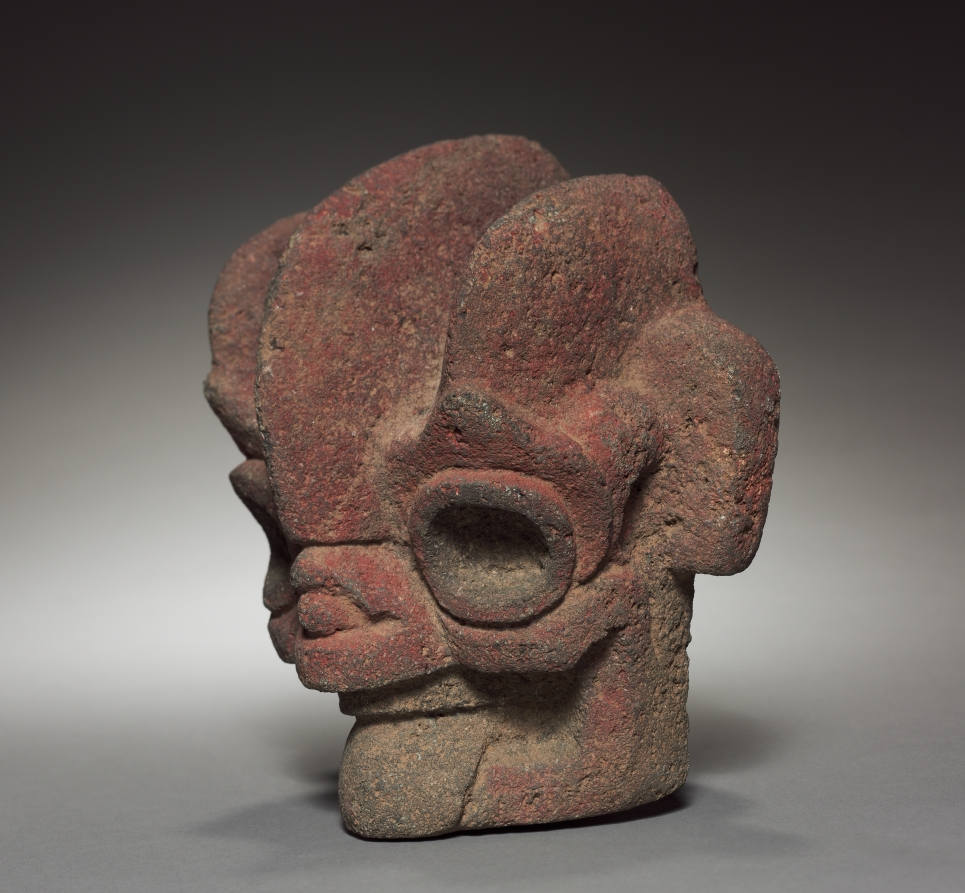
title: Head Hacha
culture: Mexico, Veracruz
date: 300–900 CE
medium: gray volcanic stone with red pigment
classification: Sculpture